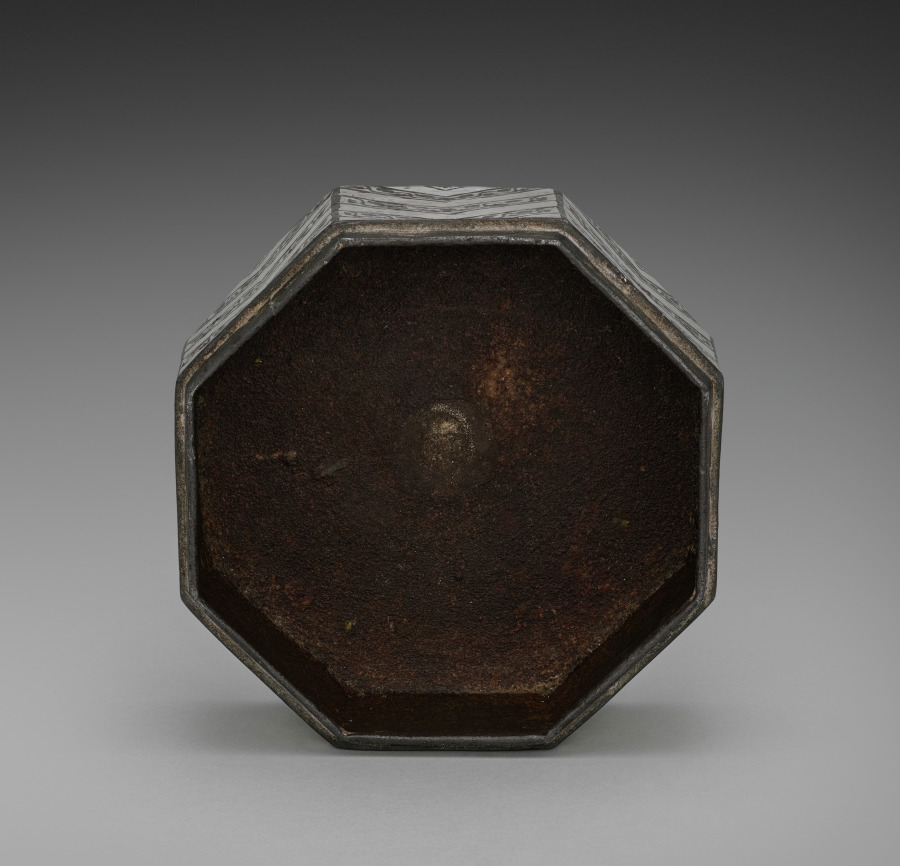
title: Bidri Pandan with Chevrons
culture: Southwestern India, Deccan, Karnataka, Bidar​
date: c. 1700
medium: Zinc alloy with silver overlay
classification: Metalwork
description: A pandan is a lidded vessel for serving paan, which has been enjoyed in India for more than two thousand years. Paan is betel or areca nut mixed with lime powder, aromatics such as clove cinnamon, or cardamom, and wrapped in betel leaf. The whole packet is chewed after a meal as a mild stimulant and mouth freshener.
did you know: The lime powder in paan functioned as an ancient antacid after meals.